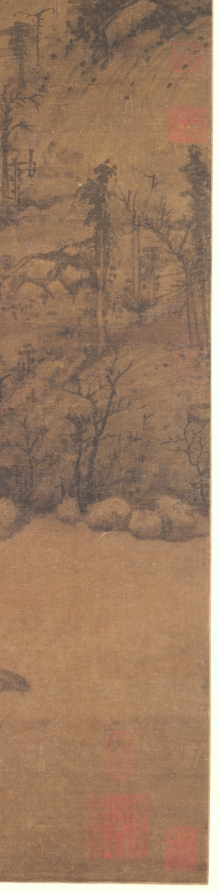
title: Summer Mountains (after Dong Yuan [active c. 937–75])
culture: China, Yuan dynasty (1271-1368)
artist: attributed to Huang Gongwang (Chinese, 1269–1354)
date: 1290–1354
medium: hanging scroll; ink and slight color on silk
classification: Painting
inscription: 【印】一峰道人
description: This monumental landscape is drawn in softly rounded strokes with darker lines frequently applied on top of lighter ones. This technique recalls one of the suggestions included in a collection of the artist's writings known as Secrets of Landscape Painting: The most difficult thing in painting is using the ink. The artist begins by using dilute ink and builds it up to the point where it begins to look right, then uses dense, black ink, applied fairly dry, and washes of deeper-toned ink. This technique distinguishes the fields from the paths, the far from the near. Huang Gongwang may have learned this technique from observing nature through the eyes of an earlier master, Dong Yuan, a painter whose style he shared.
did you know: The wet hills and moist, rich atmosphere evoke the southern Chinese summer, characterized by monsoon rains and lush growth.